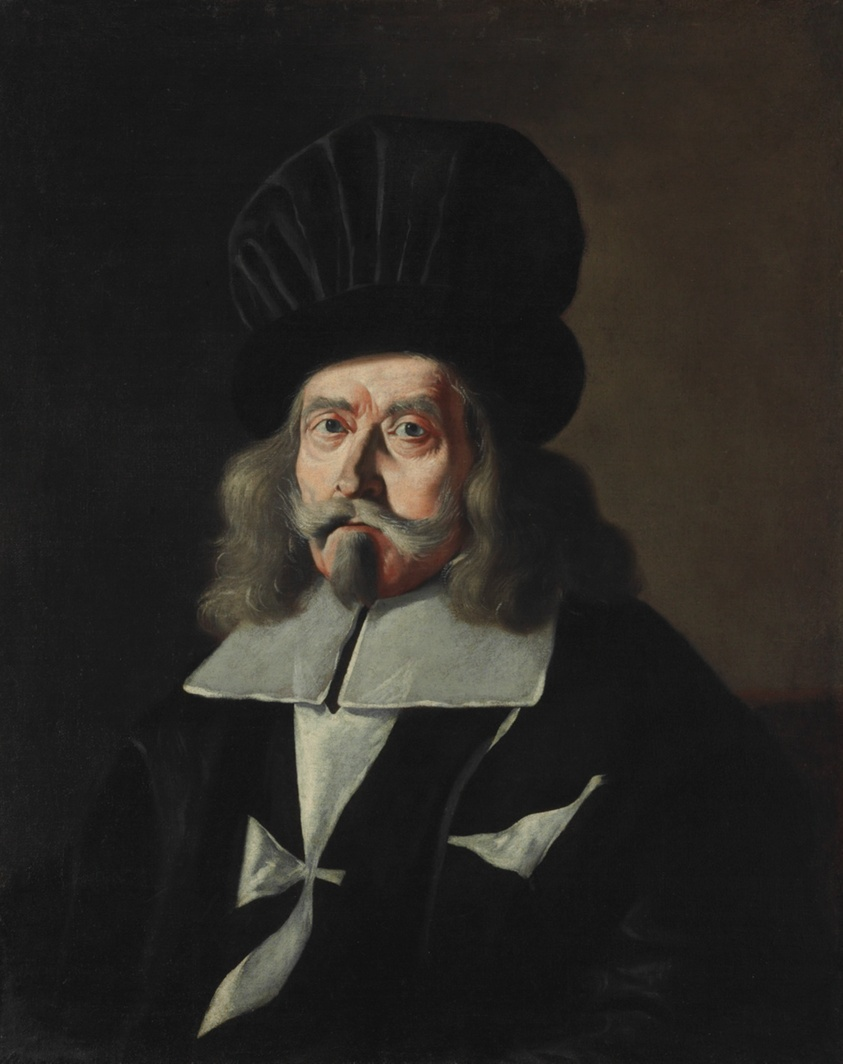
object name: Painting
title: Portrait of a Grand Master of the Knights of Malta, Martin de Redin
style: 17th Century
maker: Mattia Preti (Italian, 1613–1699)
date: c. 1660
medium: Oil on canvas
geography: Italy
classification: painting; oil paintings (visual works); Italian; portrait; paint; oil on canvas; european painting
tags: portraits: male subject, white (color), uniforms, portraits, portrait, man, black (color), bearded man